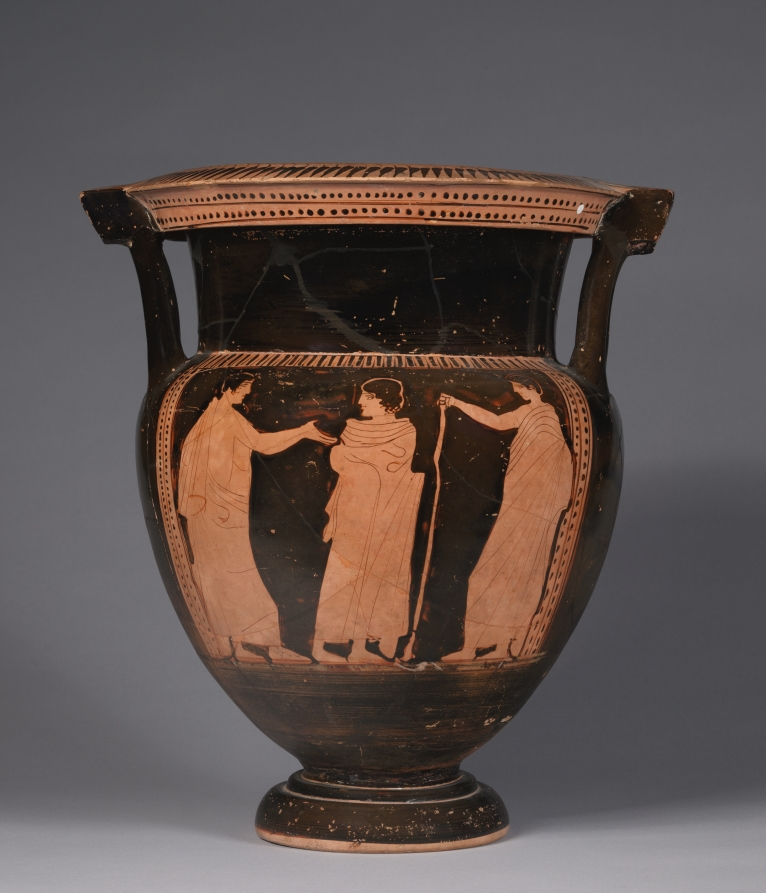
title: Red-Figure Column Krater (Mixing Vessel): Satyrs Pursuing Maenads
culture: Greek, Attic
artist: attributed to Naples Painter (Greek, Attic, active c. 450–430 BCE)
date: 440–430 BCE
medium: ceramic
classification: Ceramic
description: Two satyr-maenad pairs rush across this vase, similar but not identical to one another. The leading satyr is balding and infibulated, the trailing one more hirsute; the leading maenad carries a thyrsos, the trailing one two torches. On the reverse, a stock scene appears, with three youths standing, as if in conversation.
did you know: The column krater takes its name from the column-like struts supporting the handles and rim.